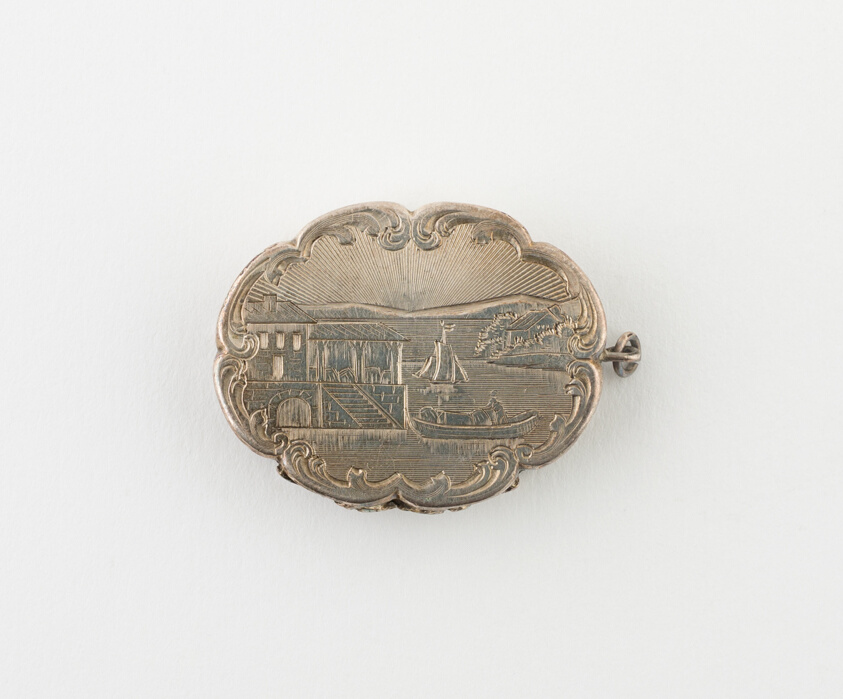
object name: Metalwork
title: Vinaigrette with Harbor Scene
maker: Nathaniel Mills; Birmingham, England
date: c. 1846/47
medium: Silver and silver gilt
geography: Birmingham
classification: container for personal use; vinaigrette (container for health care); european decorative arts; metalwork; silver; decorative object/ornament